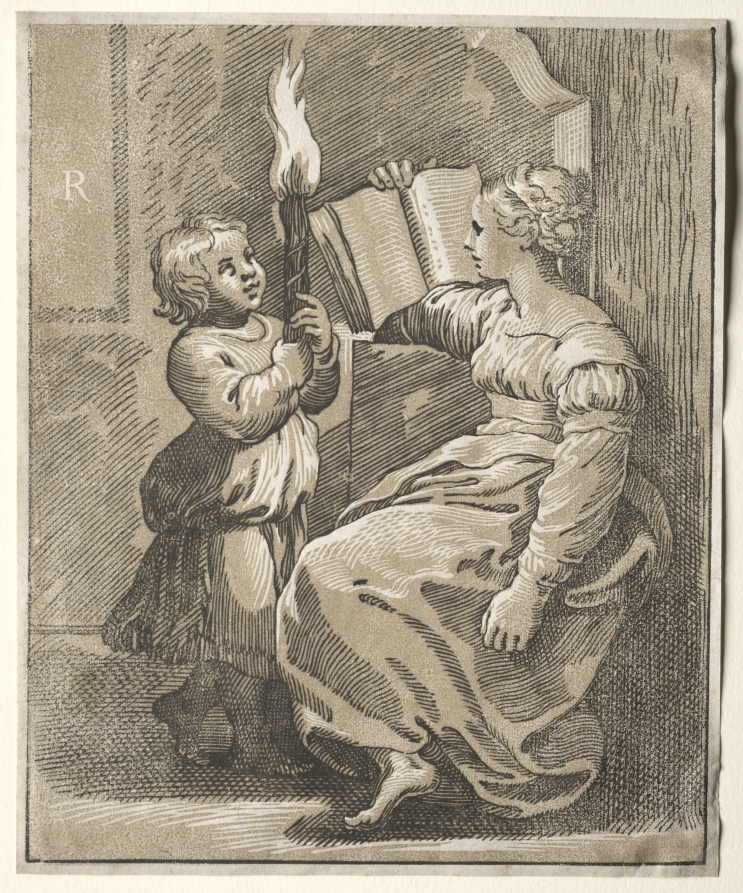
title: Sibyl Reading with a Child Holding a Torch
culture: Italy, 16th century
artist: Ugo da Carpi (Italian, c. 1479–c. 1532)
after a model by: Raphael (Italian, 1483–1520)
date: 1518–27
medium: chiaroscuro woodcut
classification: Print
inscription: On the window upper left, in tone block: "R"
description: As the innovator of the chiaroscuro process in Italy, Ugo's greatest achievement was the use of three- and four-tone blocks to simulate the subtleties of Raphael's ink wash drawings. Using woodcut, he duplicated the powerful contours, simplified forms, and spontaneous appearance of the Italian master's graphics. Here, the print shows a sitting Sybil who is reading a book to a child holding a torch to illuminate the room. The design for Sibyl Reading has been traditionally ascribed to Raphael based on the several sibylline figures (one of whom is accompanied by a putto holding a torch) in the master's decorations for the Capella Chigi, Santa Maria della Pace, Rome (1511–14), though there is no direct correspondence.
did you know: The large number of surviving prints of this subject suggests it was one of the most repeated Italian chiaroscuro woodcut designs.